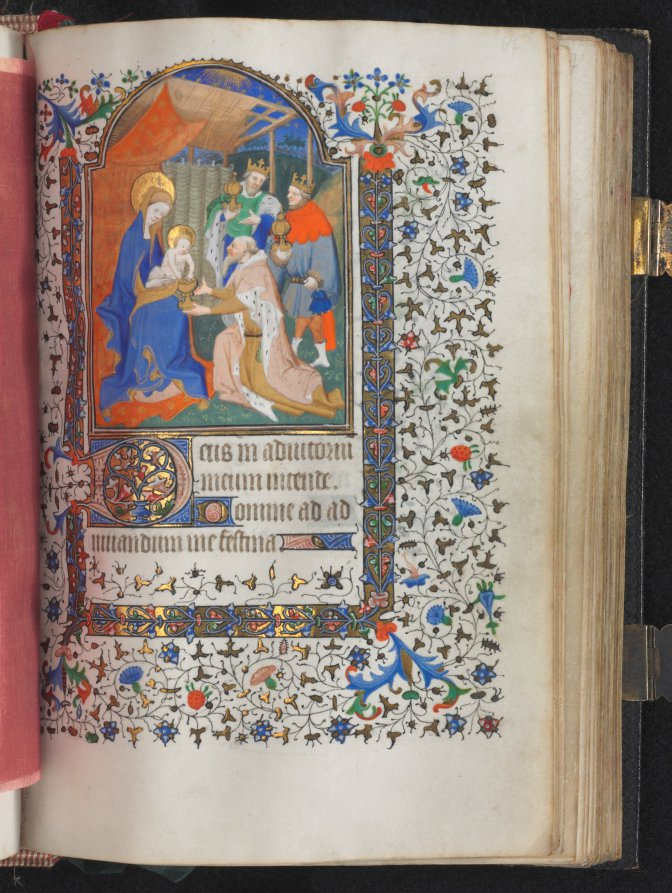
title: Book of Hours (Use of Paris): Fol. 67r, Adoration of the Magi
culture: France, Paris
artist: possibly studio or workshop of The Bedford Master (French, Paris, active c. 1405–30)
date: c. 1420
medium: ink, tempera, and gold on vellum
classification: Bound Volume